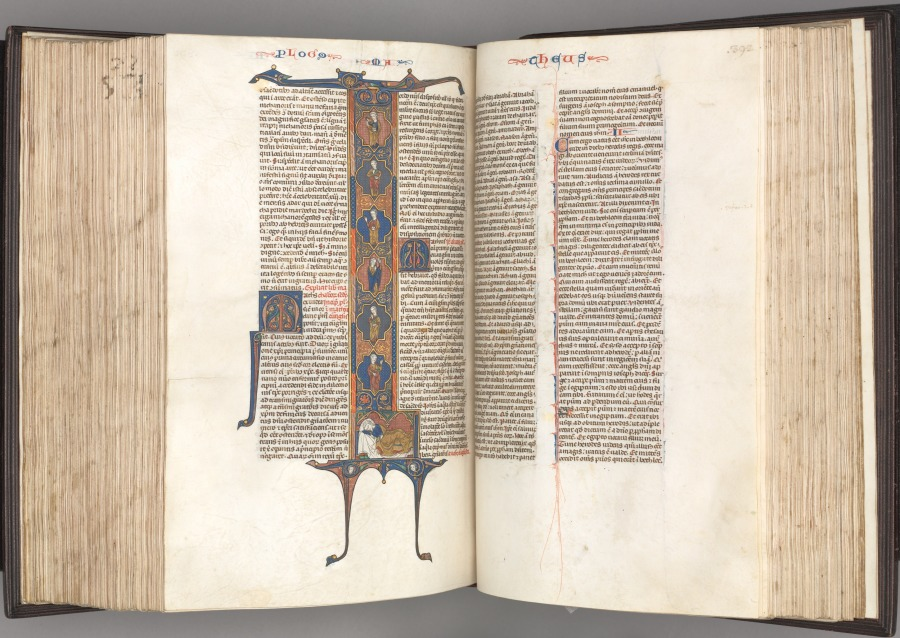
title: Fol. 391v, Matthew, full-length historiated initial L, the Tree of Jesse, with a sleeping Jesse at the base and six of the ancestors of Christ in irregular compartments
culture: Southern France, Toulouse(?), 13th century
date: c. 1275–1300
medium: ink, tempera and gold on vellum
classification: Bound Volume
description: Biblical manuscripts were highly prized and important possessions of churches, monasteries, cathedral schools, and universities throughout medieval Europe. The biblical texts were known as the vulgate, the translations made by Saint Jerome in the fourth century from Hebrew and Greek into Latin, which became the definitive and official Latin version of the Roman Church. In the 13th century, the bible was, for the first time, produced as a single volume with an officially sanctioned sequence to its books and chapters as illustrated by this example. The very extensive decoration of this bible is arranged hierarchically to indicate the relative importance of the various texts so that full or almost full-page initials mark the openings of the first prologue, Genesis, and the first Gospel; historiated initials mark the beginning of each book and illuminated initials mark the Prologues.